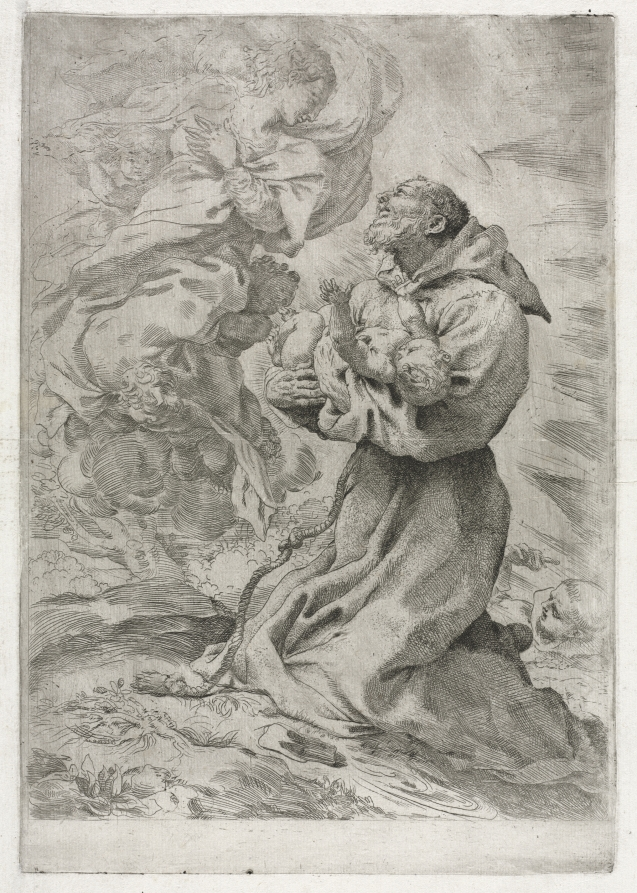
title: The Vision of St. Francis of Assisi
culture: Italy, 16th century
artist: Pietro Faccini (Italian, 1562–1602)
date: 1590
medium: etching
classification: Print